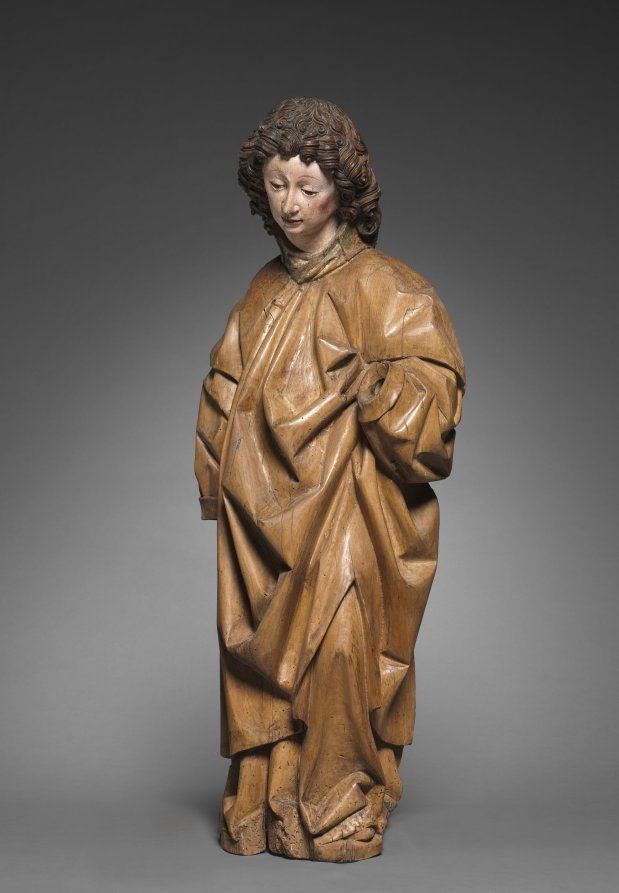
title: Saint Lawrence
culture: Austria, South Tyrol, late 15th century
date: c. 1490–1500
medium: lindenwood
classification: Sculpture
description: Lawrence of Rome (about 225–258 CE) was one of the seven deacons of ancient Rome martyred in 258 CE, and became one of the most widely venerated saints during the Middle Ages. According to tradition, he met his martyrdom by being roasted on a gridiron, an attribute which he either holds or stands upon in art. (See a depiction of him by Tilman Riemenschneider nearby in this gallery.) Lawrence is always portrayed as a young man wearing the deacon’s dalmatic. The original source and context of this sculpture is not known. Since it is not carved in the round, it was likely placed within the niche of a large altarpiece.